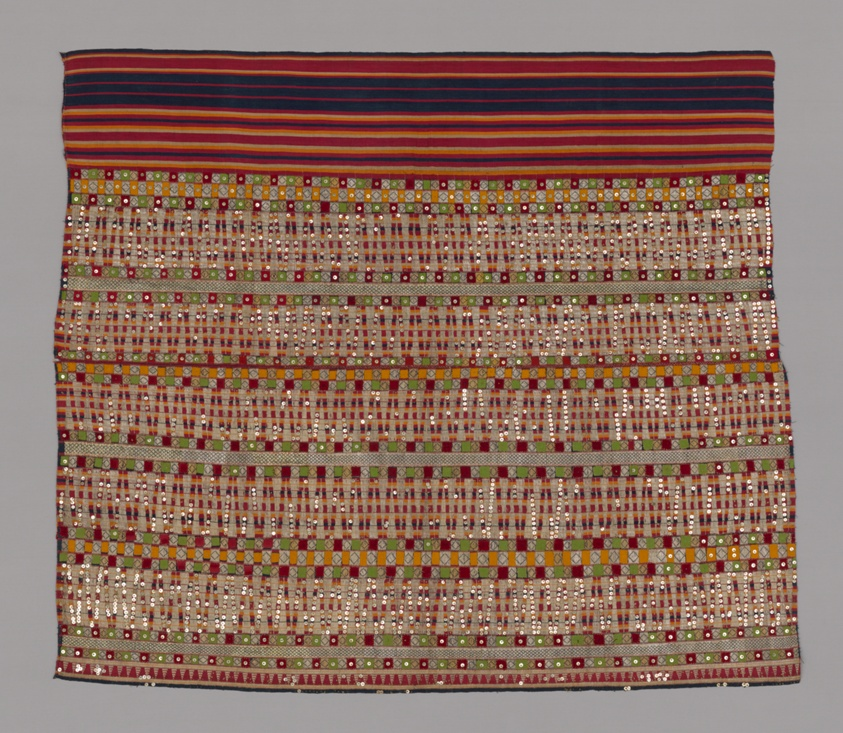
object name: Costume and Accessories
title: Woman's Ceremonial Skirt (Tapis)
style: indonesian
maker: Indonesia, South Sumatra, Lampung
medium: Cotton, gold-leaf-over-lacquered-paper strip wrapped cotton, and silver-on-adhesive-coated-paper-strip wrapped cotton, warp-faced, weft ribbed plain weave with supplementary brocading wefts; appliquéd with cotton, plain weave with supplementary pile wefts; fulled and ( ) felt; embellished with gilt-metal coils on cotton and gilt-metal spangles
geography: Indonesia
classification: needlework (visual works); costume